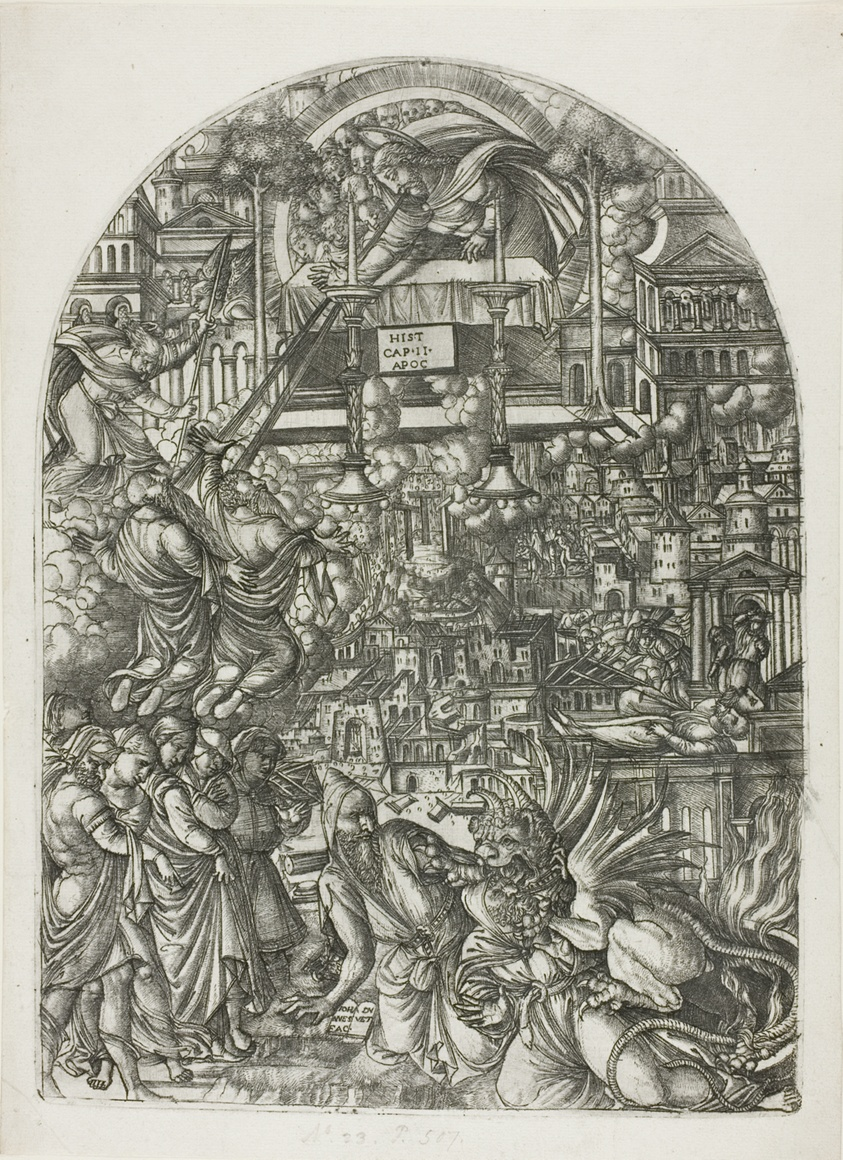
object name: Print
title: Measurament of the Temple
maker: Jean Duvet (French, 1485-after 1561)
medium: Engraving in black on ivory laid paper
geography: France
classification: engraving; print; prints and drawing